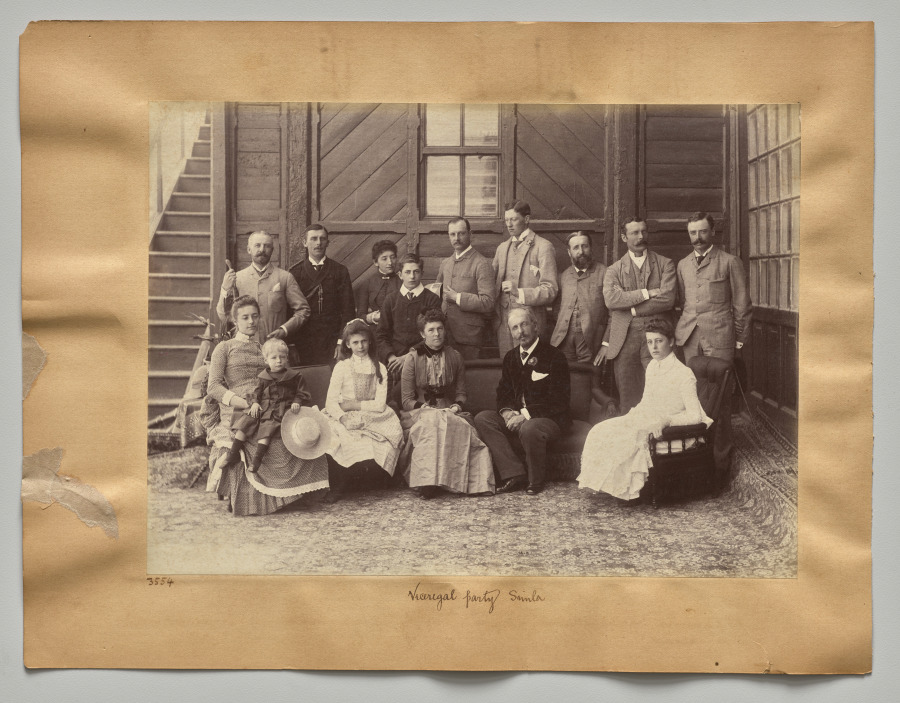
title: Viceregal Party Shimla (verso)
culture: India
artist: Raja Deen Dayal (Indian, 1844–1905)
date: 1887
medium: albumen print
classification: Photograph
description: These photographs are part of an album, now disassembled, of around 105 photographs taken in India between 1885 and summer 1887 that provide glimpses into the lives of the British colonial elite and royal and upper-class Indians. The museum holds another group of 37 pictures from this album (2016.266), which was probably commissioned by a British civil servant visiting or working in India around 1888 as a personal souvenir of his experiences there.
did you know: Raja Deen Dayal is regarded now, and was considered during his lifetime, to be India’s most important 19th-century photographer.